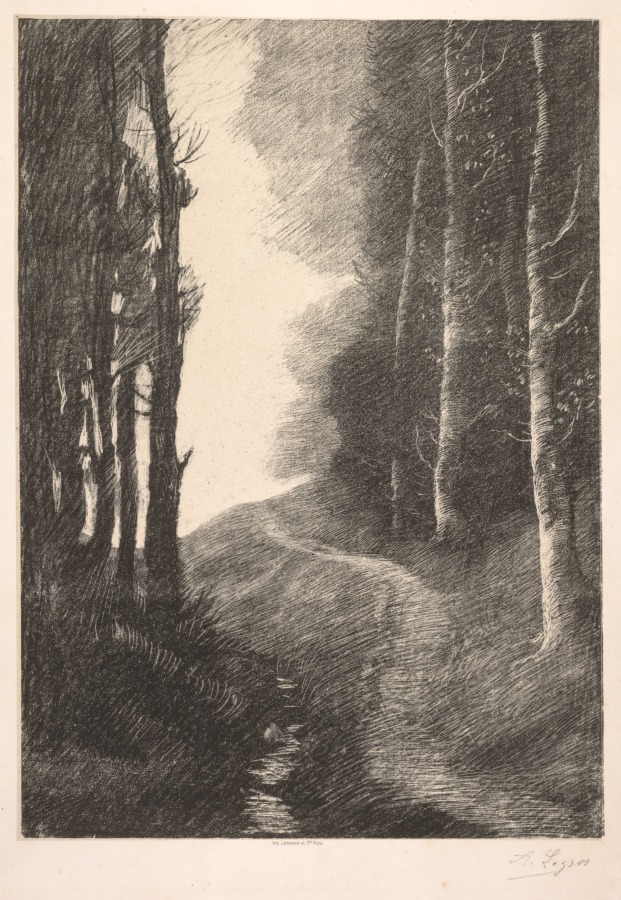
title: Landscape at Bouleaux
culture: France, 19th century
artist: Alphonse Legros (French, 1837–1911)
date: c. 1857–1911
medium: lithograph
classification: Print